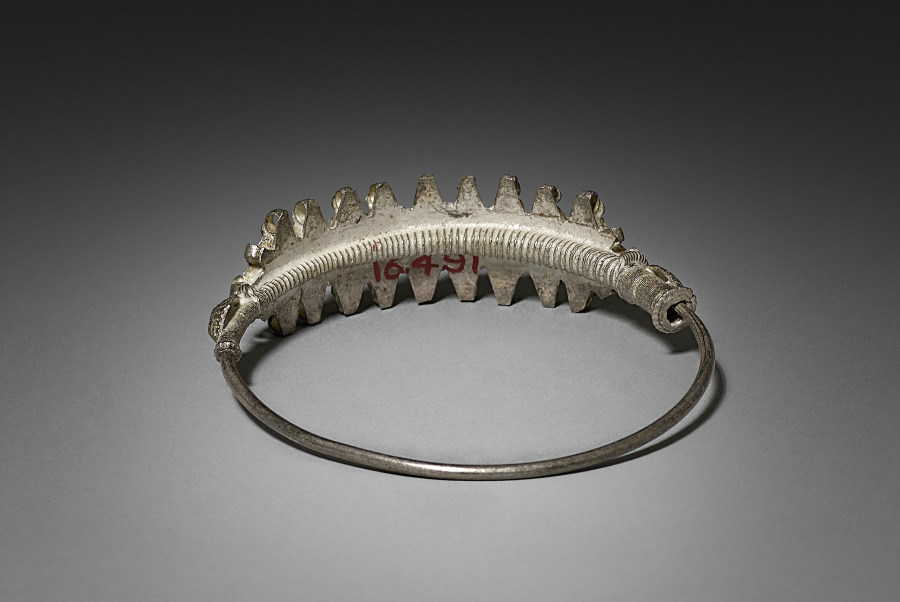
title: Nose Ring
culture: India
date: early 1900s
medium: silver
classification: Jewelry